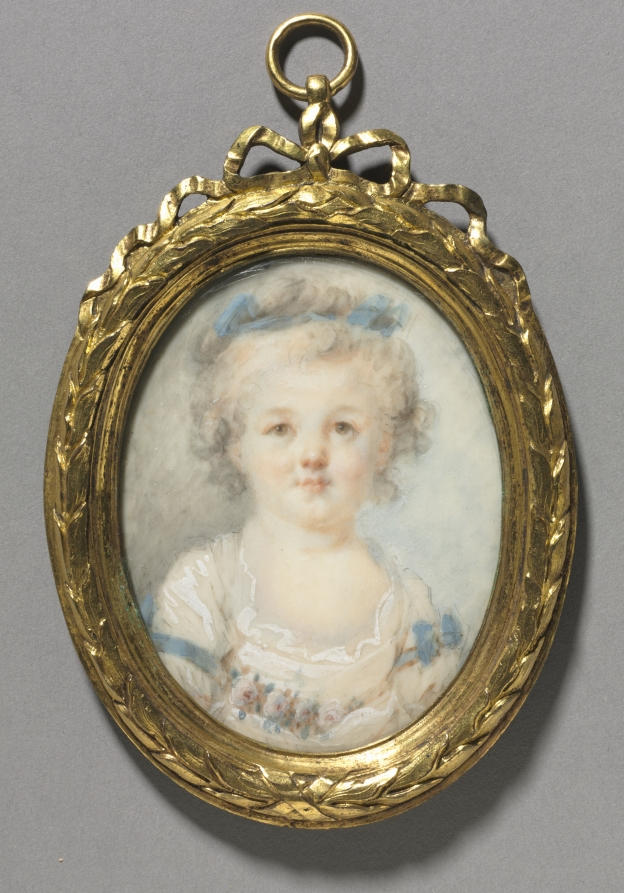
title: Portrait of a Little Girl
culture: France, 18th century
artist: attributed to Anne-Marie Fragonard (French, 1745–1823)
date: c. 1785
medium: watercolor on ivory in a gilt metal frame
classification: Portrait Miniature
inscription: Inscribed on back: Fragonard, Vente de Rouillard, 1853, also F[?] day[?] 14; on edge: 1776 rtt xx.